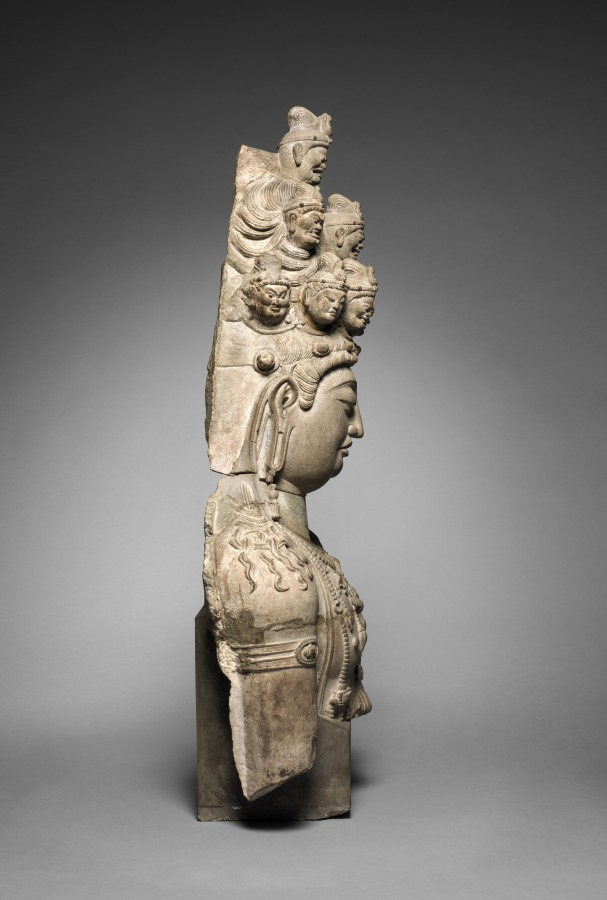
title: Eleven-Headed Guanyin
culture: China, Tang dynasty (618-907)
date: early 700s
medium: gray sandstone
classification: Sculpture